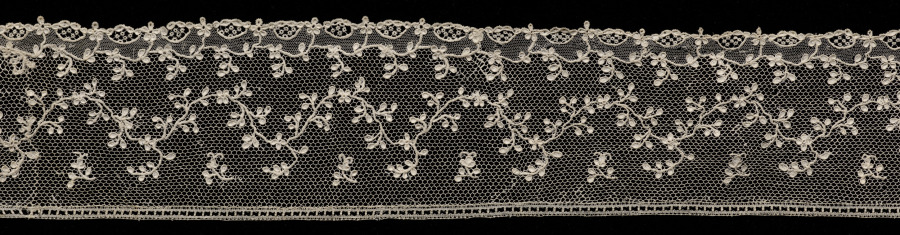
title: Lace Edging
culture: France, Argentan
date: 1715–74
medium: Linen: needle lace (Point de Argentan)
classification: Lace